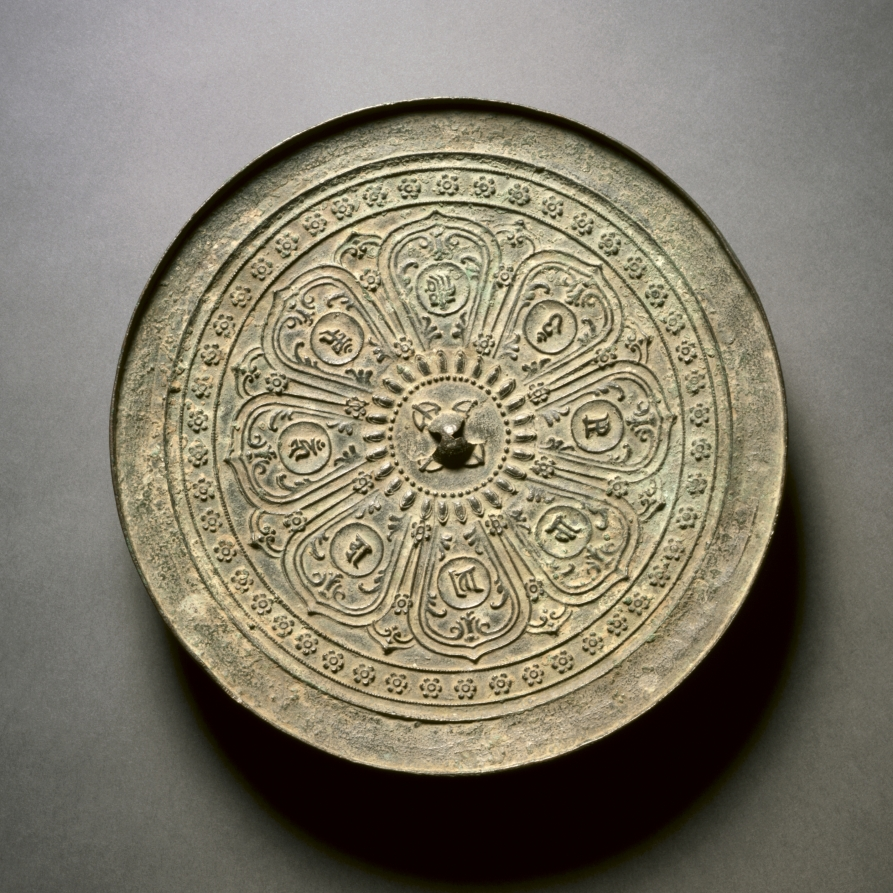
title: Mirror with Lotus and Mantra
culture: China, Yuan dynasty (1271-1368)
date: 1271–1368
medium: bronze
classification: Metalwork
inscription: "In the name of Om mani padme hum."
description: This mirror features intricate Buddhist designs. Around the central knob are four leaves, a ring of tiny beads, and then a circle made up of small lotus flower designs. Outside of that are eight big petal shapes, inside each is a Sanskrit letter. The mirror has the phrase "In the name of Om mani padme hum" written in a slightly incorrect form of Sanskrit, possibly because the Chinese mirror maker was not familiar with the language.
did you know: A mantra, or meditative statement, is embedded in the petals of the lotus flower on the mirror's back.